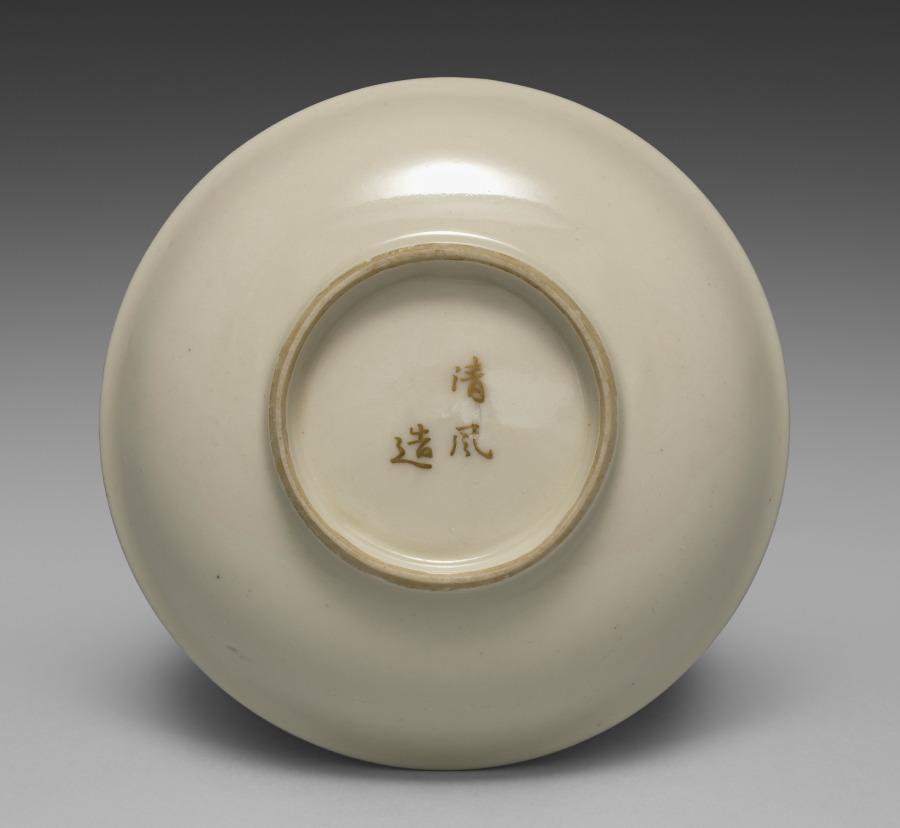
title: Small Dish from Dining Set with Plum Blossoms and Cracked-Ice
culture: Japan, Meiji period (1868–1912)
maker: Seifū Yohei II (Japanese, 1844–1878)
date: c. 1875–78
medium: Porcelain with molded designs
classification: Ceramic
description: Each item in this set has a delicate low-relief design of flowering plum branches over scattered, intersecting lines meant to resemble the cracked-ice surface of a frozen body of water and is signed on the base in gold pigment. While Yohei II produced many fine works in underglaze blue, like those produced by Kiyomizu Shichibei, he also made works in quite different styles later in his career, from the early 1870 s. In 1873, he was appointed purveyor to the Industrial Center of Kyoto Prefecture, a designation associated with Kyoto’s efforts to reach an international market through the port of Kobe; and from 1875 until his death, he was involved in national-level projects to present Japanese ceramics across the world. It was during this period that Yohei III was apprenticed to Yohei II, and it has been suggested that this set may in fact be an early example of Yohei III’s work, which he signed with his teacher’s name. Decorated with flowers resembling Japanese textile motifs, the set calls to mind the design of Yohei II’s pair of vases with plum blossoms in the Victoria and Albert Museum. Here, the elaborate trees created for a formal public exhibition setting have been translated into the approachable blossoms of the genteel domestic environment. While the designs are consistent across the pieces, each raised flower petal and pistil and each incised line in the ice was done by hand, so the cups, bowls, and dishes are similar yet unique. The bottoms of two boxes once identified the set’s owner, but the information has been deliberately obscured with black ink. However, inscriptions still visible appear to indicate two occasions, once at the end of July 1886 , and once again in June 1916 , when parts of the set were requested from Hokura in Niigata Prefecture. The location corresponds to a neighborhood in the present-day city of Jōetsu. The surname Tsuji 辻 also appears on a paper tag affixed to one of the box cloths. Future research may possibly reveal more about their provenance. A vase by Yohei III in a private collection combines the formal grandeur of the Yohei II vases in the Victoria and Albert Museum with the gentler design of this dining set, placing flowering plum trees against soft, scalloped-edge clouds resembling those in golden screens.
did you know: The dining wares have a creamy white coloration that the four boxes containing them identify as Korean in style.